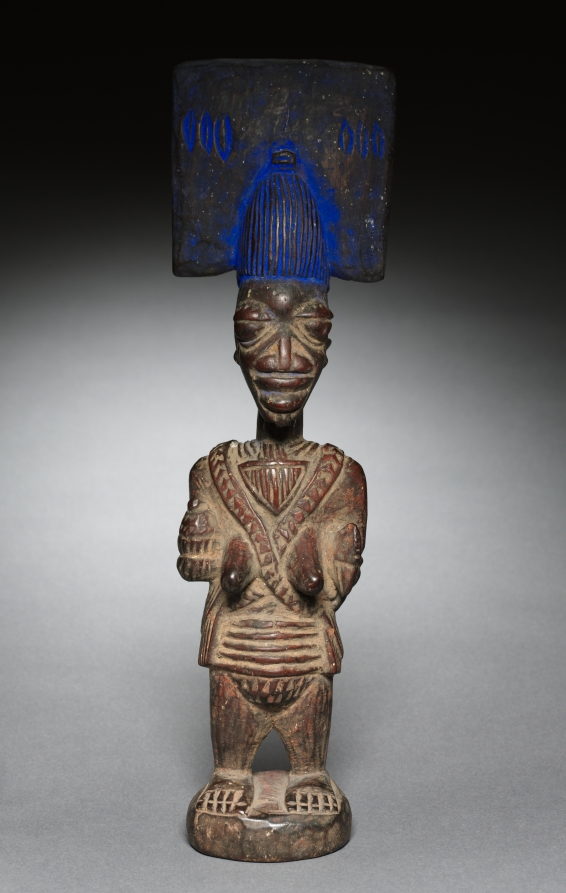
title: Shrine Figure for Sàngó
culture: Africa, West Africa, Nigeria, Yorùbá-style maker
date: c. 1910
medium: Wood, probably bluing, and organic material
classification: Sculpture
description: Sàngó is a king turned god in the Yorùbâ cosmology. One of the many òrìṣà—a god or divine spirit—that Yorùbá people can become devotees of and appeal to, Sàngó is often associated with lightning and thunder. The shape atop the female figure's head is the double-axe symbol of Sàngó. She wears a triangle-shaped amulet, waist beads, and bracelets, all signifying that she is a priestess. Standing on a base, rather than a handle, this figure was likely placed in a shrine dedicated to Sàngó.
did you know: The bright blue color on this sculpture is bluing, a powdered product used to brighten laundry.